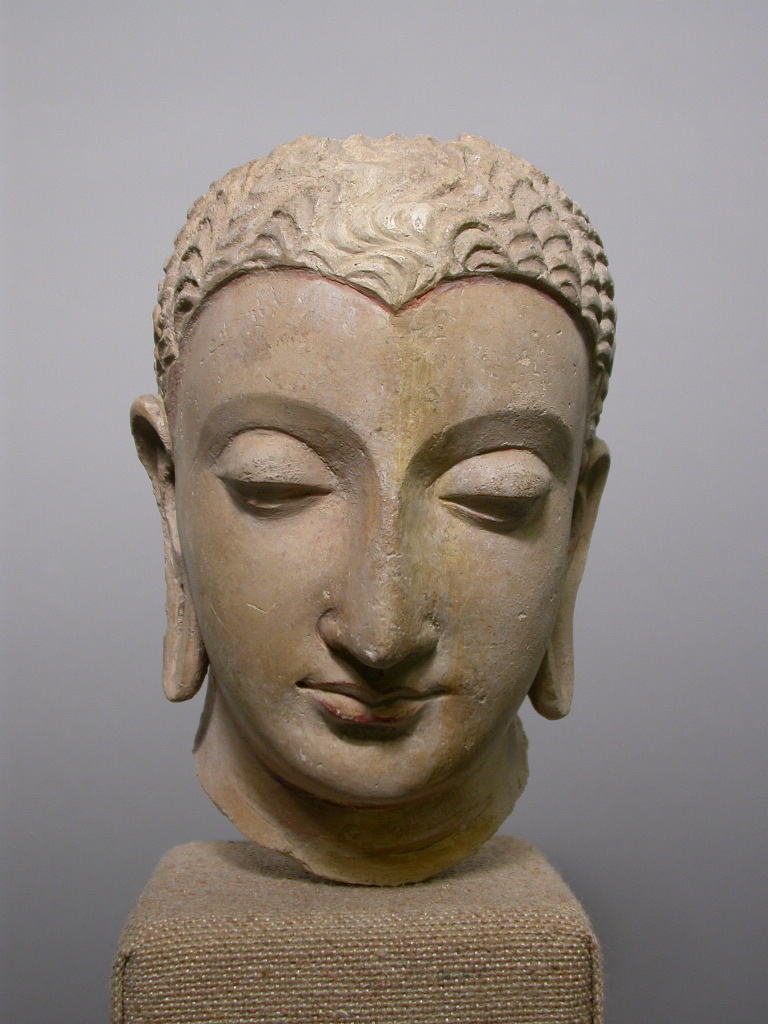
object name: Sculpture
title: Head of Buddha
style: South Asian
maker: Afghanistan or Pakistan; Ancient region of Gandhara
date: Kushan period, 3rd–5th century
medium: Stucco with traces of red pigment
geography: Gandhara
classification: bust/head; stuccowork; sculpture; asian art